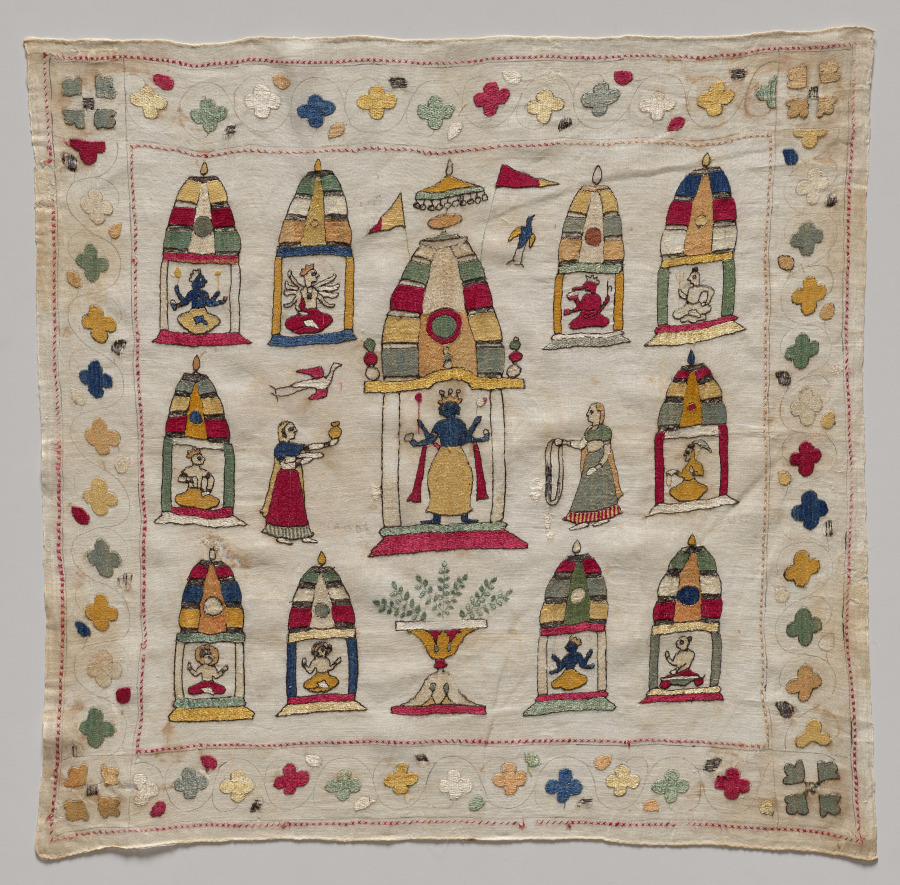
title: Rumal with Vishnu temple and subsidiary shrines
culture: Northern India, Pahari Kingdom of Chamba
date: 1700s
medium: Silk and silver embroidery on cotton tabby ground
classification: Embroidery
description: Two women bring gifts of pure water in a golden pot along with a flower garland to the four-armed blue Vishnu, whose favorite plant, the Tulsi basil, grows in an altar in front of the temple. Ten more shrines round out the sacred complex. To the upper right, the temple of Shiva with his trident stands next to that of his red, elephant-headed son, Ganesha. To the lower left, there appears to be temples to the sun and moon. Silver threads used to denote jewelry have tarnished and appear black. The unfinished border reveals that outlines and stitches for the vines were sewn last.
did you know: This reversible embroidery was made using double-sided satin stitch, so the pictorial composition can be viewed from both sides.